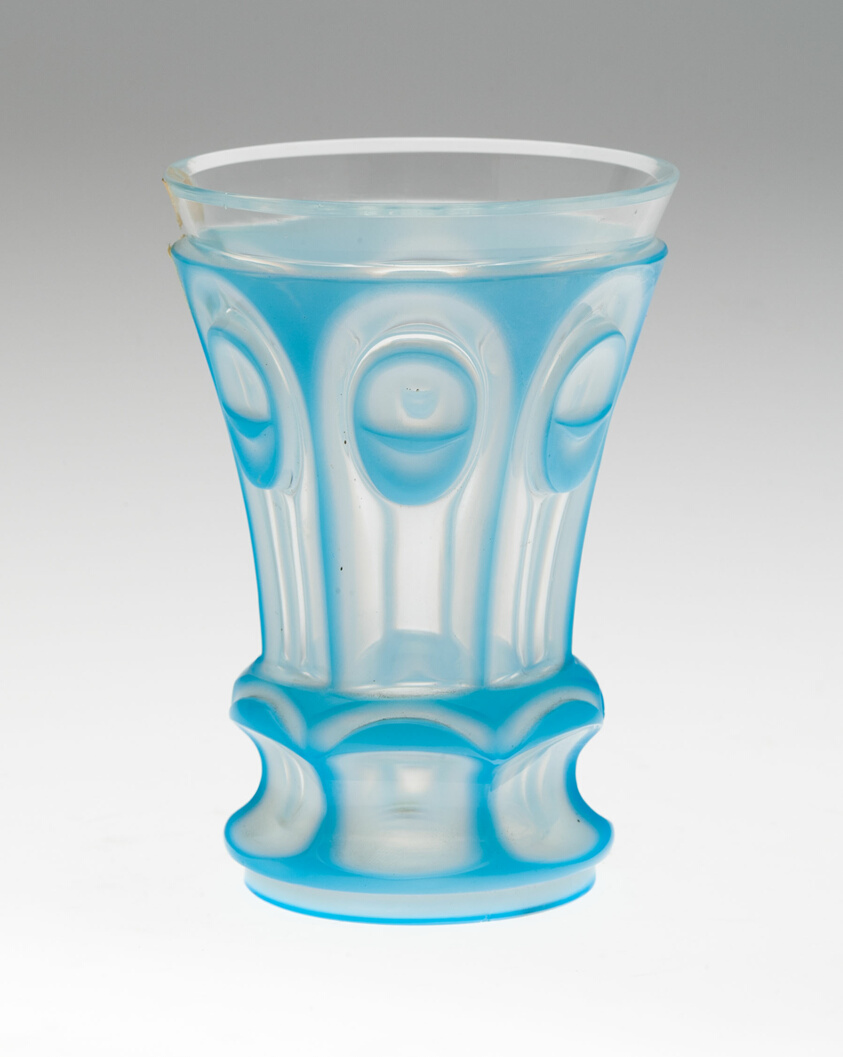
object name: Glass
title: Beaker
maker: Bohemia, Czech Republic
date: c. 1845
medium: Glass; blown, cut, overlaid with opaque blue glass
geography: Bohemia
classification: drinking vessel; glass; european decorative arts